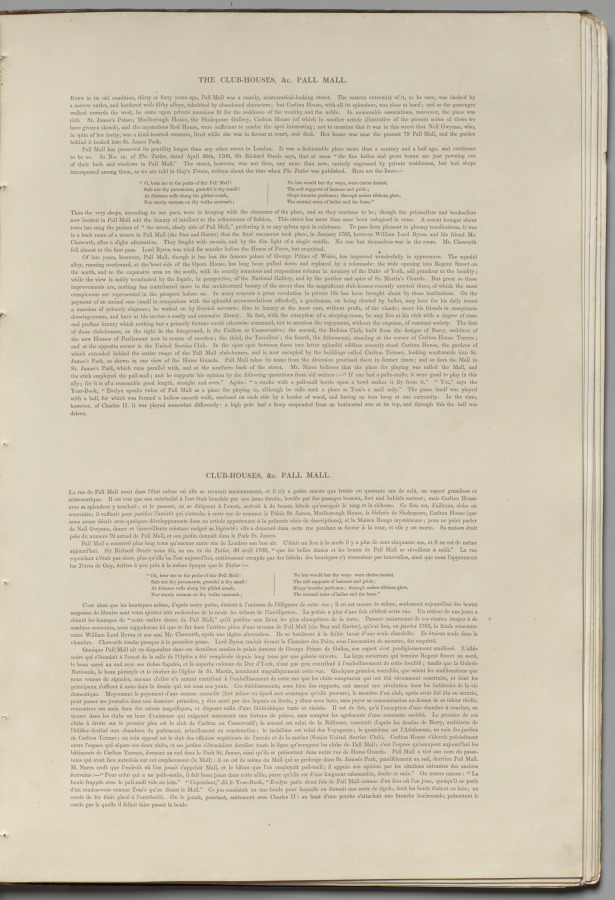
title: London As It Is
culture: England, 19th century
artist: Thomas Shotter Boys (British, 1803–1874)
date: 1842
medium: lithograph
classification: Bound Volume